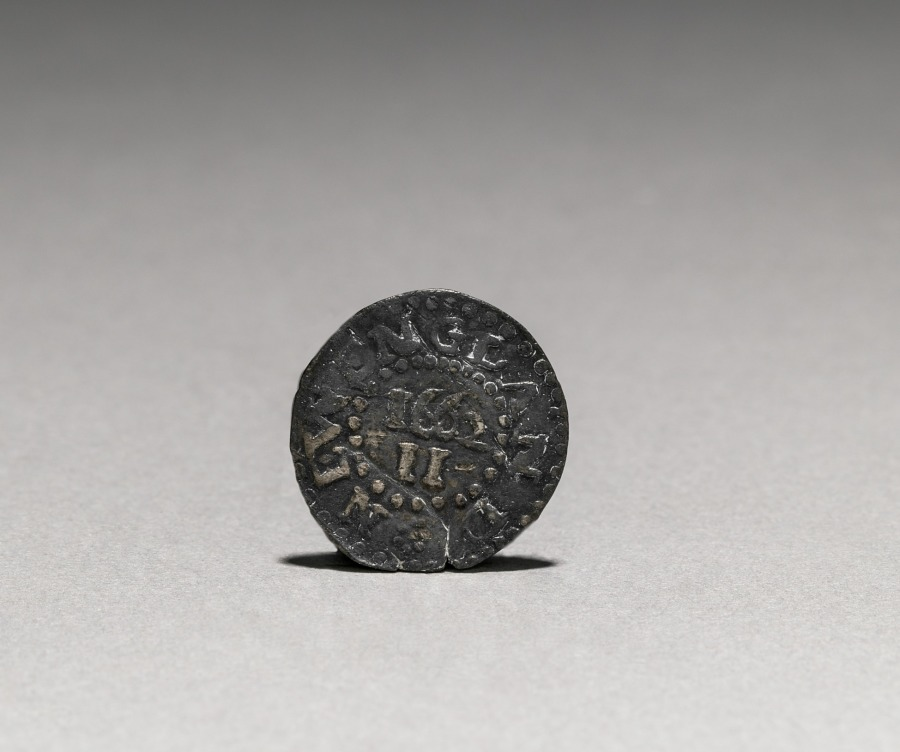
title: Oak Tree Two Pence (reverse)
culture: America, Massachusetts, Boston, 17th century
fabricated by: John Hull (American, 1624–1683)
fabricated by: Robert Sanderson (American, 1609–1693)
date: 1662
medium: silver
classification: Coins